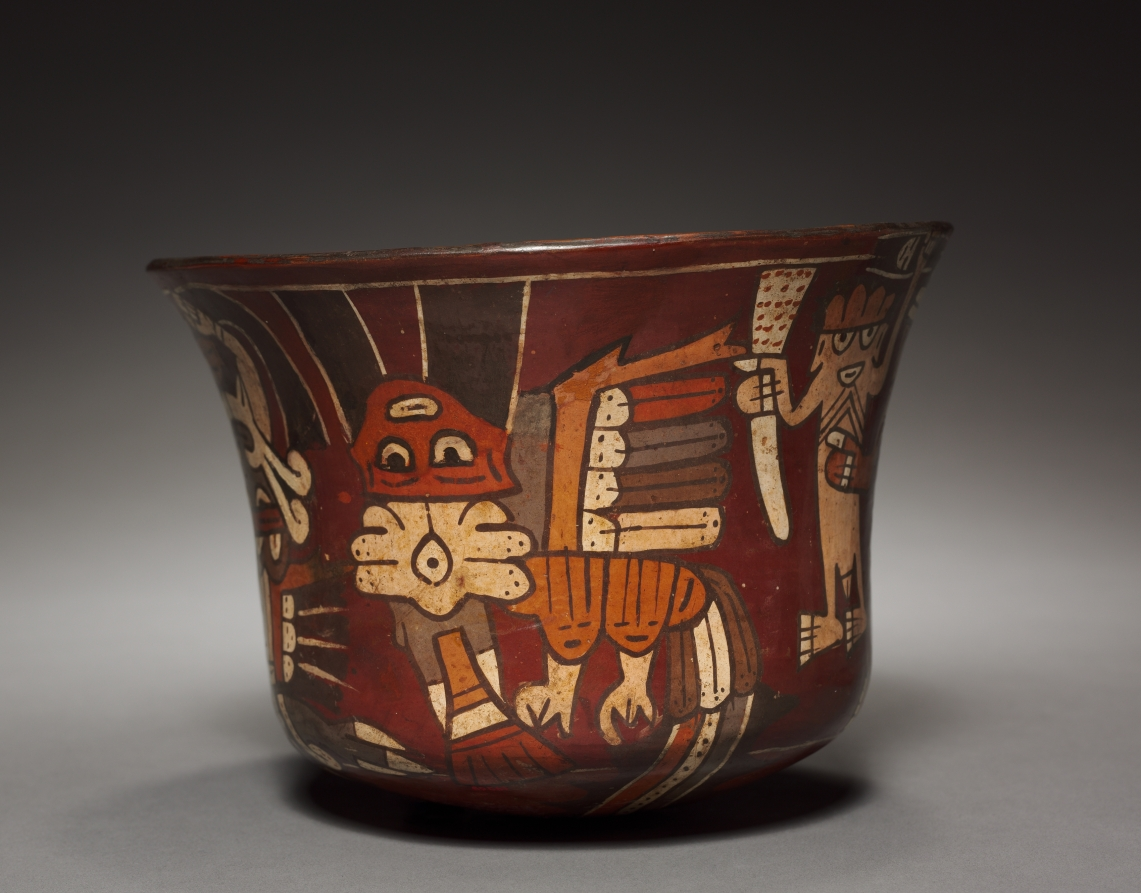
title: Bowl with Costumed Being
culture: Peru, South Coast, Nasca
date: 100 BCE–700 CE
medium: earthenware with colored slips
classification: Ceramic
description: Supernatural figures like the one on this bowl are shown wearing ornaments that actually exist-like the nearby Mouth Mask-they may represent humans clothed as deities who served as living cult images during rituals. The figure holds a severed head that probably alludes to capture of an enemy’s life force, since severed heads and fertility are linked in Nasca art.